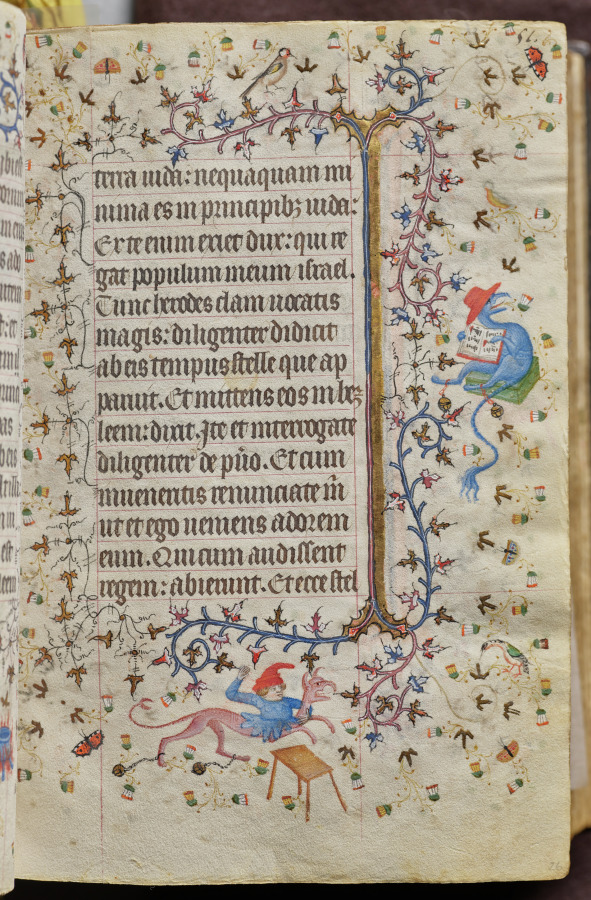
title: Hours of Charles the Noble, King of Navarre (1361-1425): fol. 26r, Text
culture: France, Paris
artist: Master of the Brussels Initials and Associates (French)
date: c. 1405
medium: ink, tempera, and gold on vellum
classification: Bound Volume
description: This precious volume was obviously highly prized by its owner, the French-born King of Navarre, who had his coat of arms painted on no less than twenty folios. Rather than directly commissioning this manuscript from a specific workshop, it seems that Charles the Noble acquired his book of hours -- perhaps ready-made for the luxury market -- while on a trip to Paris in 1404-05. A collaborative effort, six painting styles are evidenced within the pages of this codex, those of two Italians, two Frenchmen, and two Netherlanders. The painter who was responsible for the planning and decoration of the book, and who produced seventeen of the large miniatures, was a Bolognese artist known as the Master of the Brussels Initials. His principal assistant, responsible for most of the borders, was a Florentine who signed his name "Zecho" da Firenze on folio 208 verso.